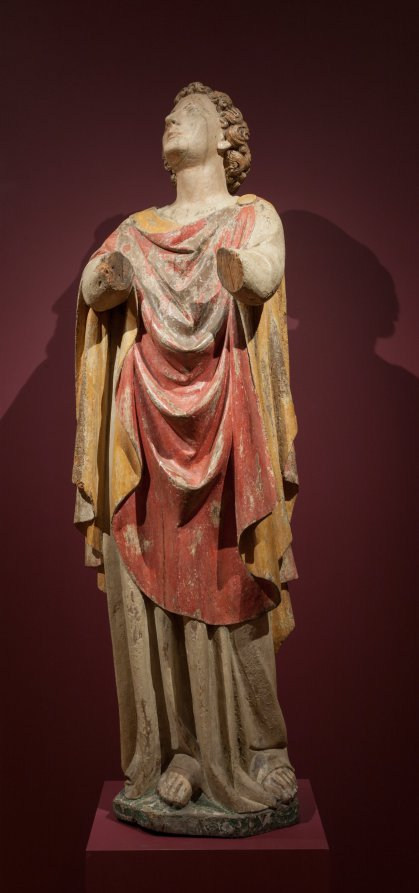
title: Saint John the Evangelist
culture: Italy, Tuscany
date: c. 1400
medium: polychromed walnut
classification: Sculpture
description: This sculpture was originally part of a life-sized Crucifixion group and intended to be seen with two more statues: a crucified Christ and a standing Virgin. Multifigured ensembles in wood belong to a vigorous tradition in central Italy extending from the 1200s to the 1400s. Most commonly, these groups represent the Deposition (Christ being lowered from the cross) or the Lamentation (Mary cradling the dead Christ on her lap). Crucifixion groups consisted of a central sculpture of Christ on the cross flanked on his right by the Virgin Mary and on his left by Saint John the Evangelist. Such groups were often displayed during Holy Week in Italy and Spain.